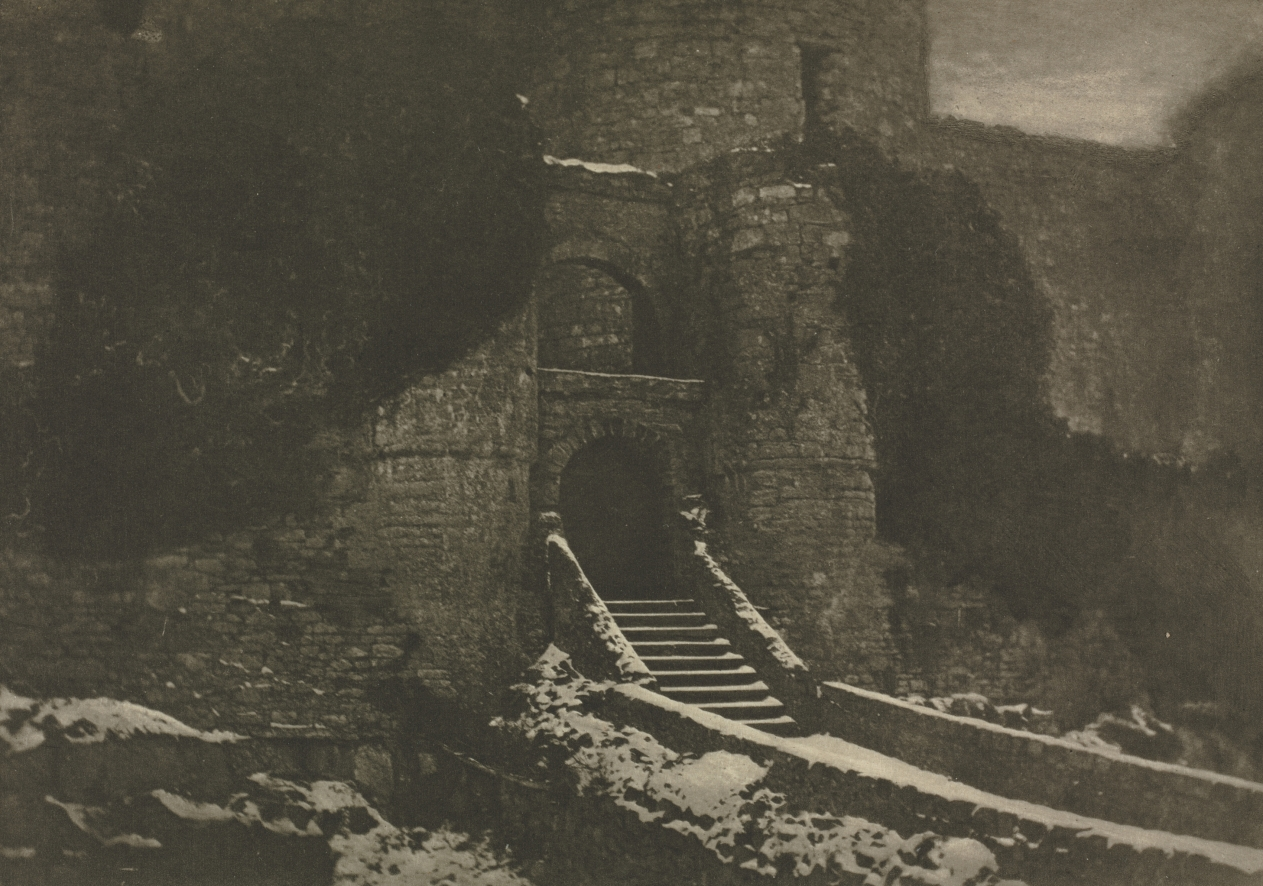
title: Camera Work: Harlech Castle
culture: England, 20th century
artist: J. Craig Annan (British, 1864–1946)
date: 1910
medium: photogravure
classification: Bound Volume